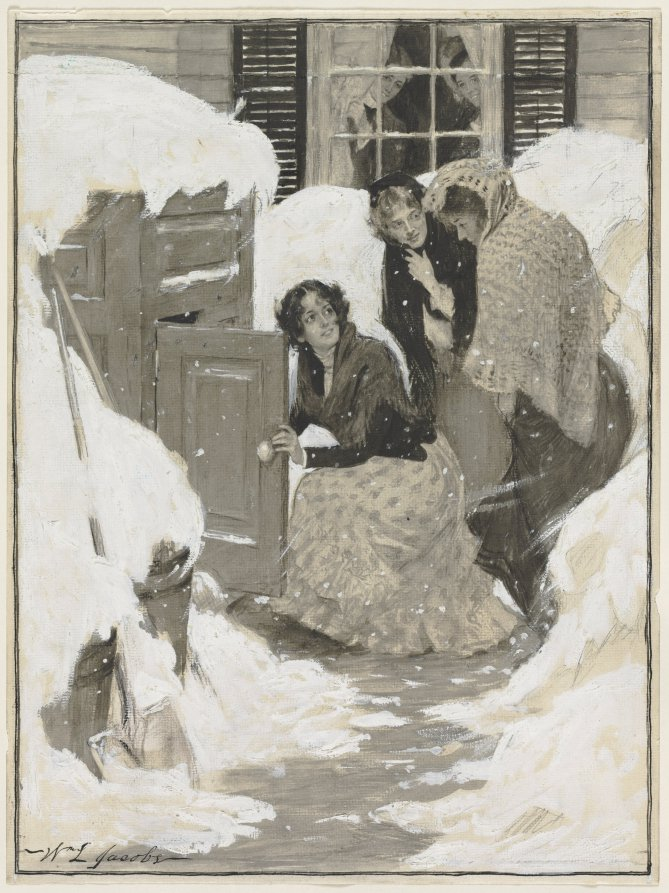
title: Sketch for a Book Illustration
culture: America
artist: William Leroy Jacobs (American, 1869–1917)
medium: watercolor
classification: Drawing